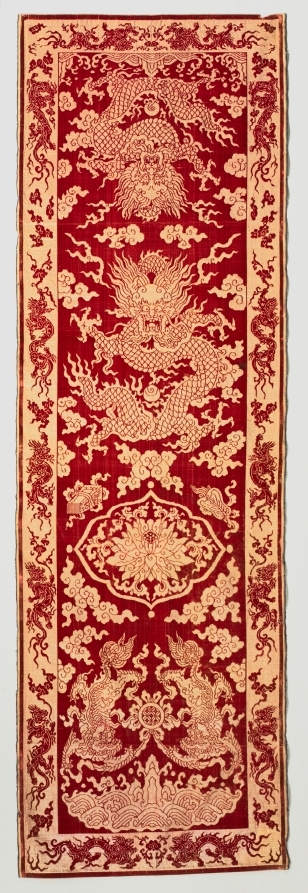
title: Velvet Strip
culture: China, Qing dynasty (1644-1911)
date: mid-1800s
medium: Velvet and gold thread; brocade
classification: Velvet